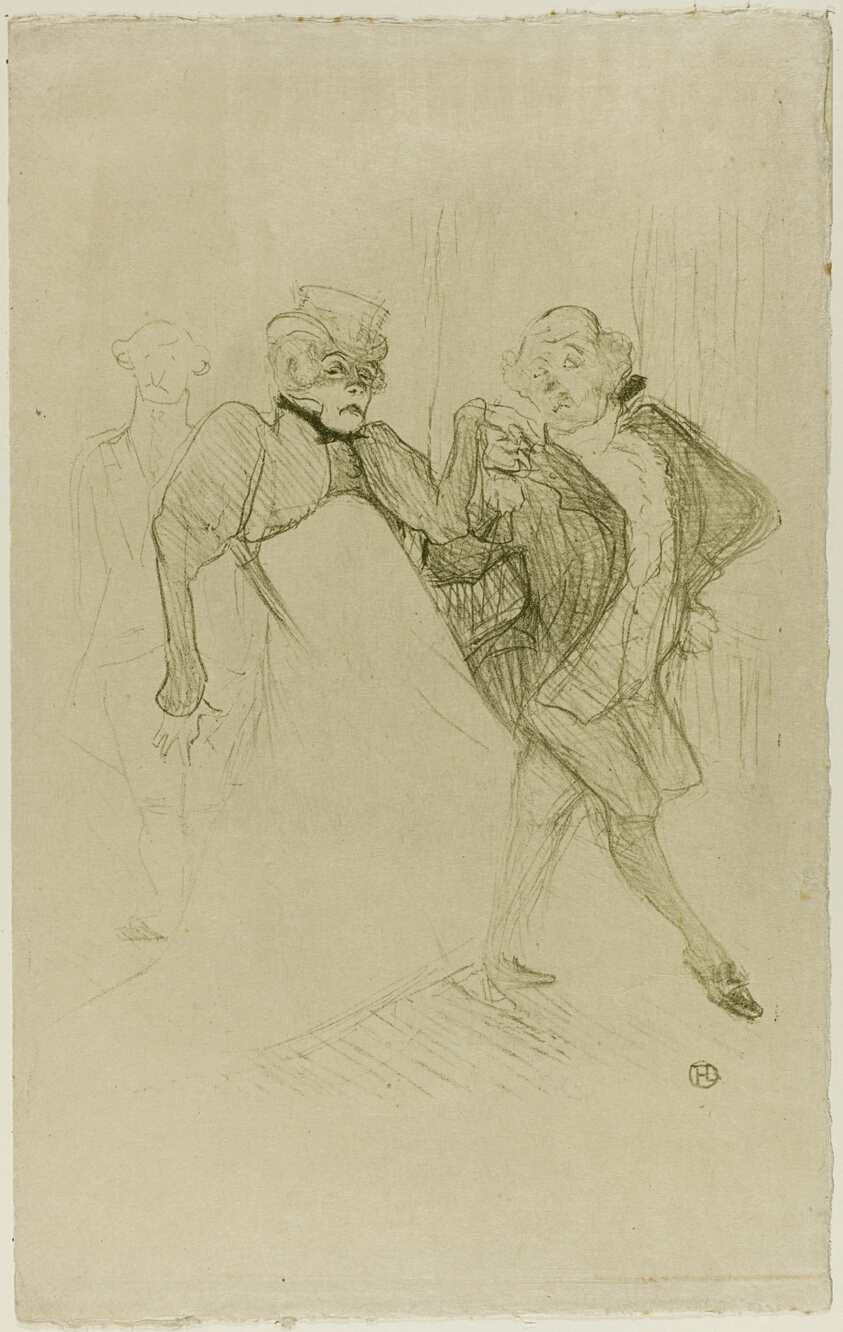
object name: Print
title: Réjane and Galipaux, in Madame Sans-Gêne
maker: Henri de Toulouse-Lautrec (French, 1864-1901)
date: 1893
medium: Color lithograph on cream laid Japanese paper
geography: France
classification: lithograph; print; prints and drawing